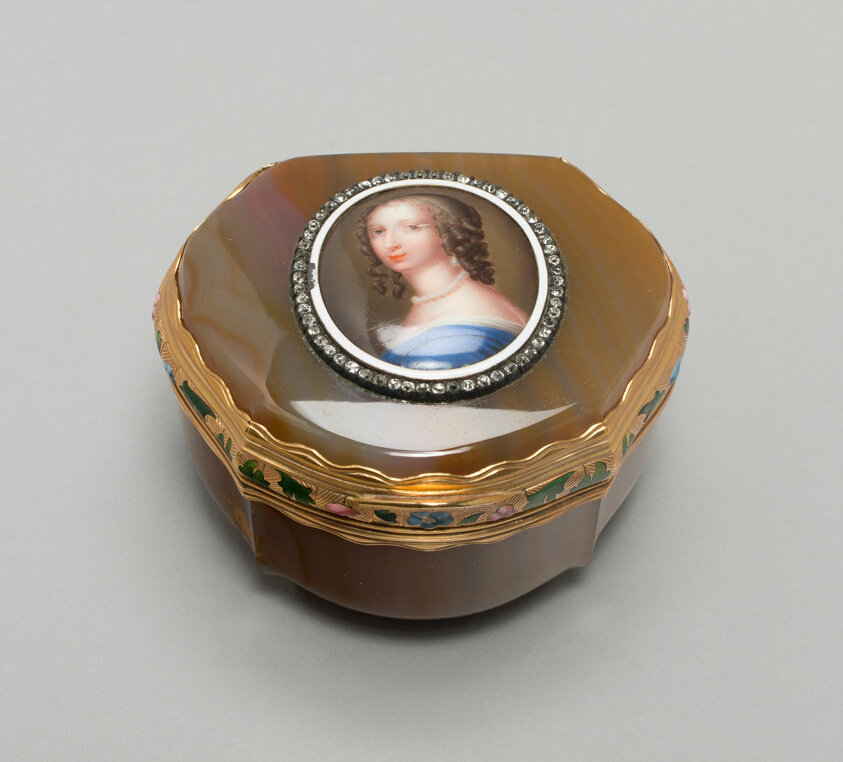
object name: Metalwork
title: Snuff Box: Portrait of Henrietta, Duchesse d'Orleans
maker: Paris, France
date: 18th century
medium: Agate, diamonds, enamel on copper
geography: France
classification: snuff box; european decorative arts; metalwork